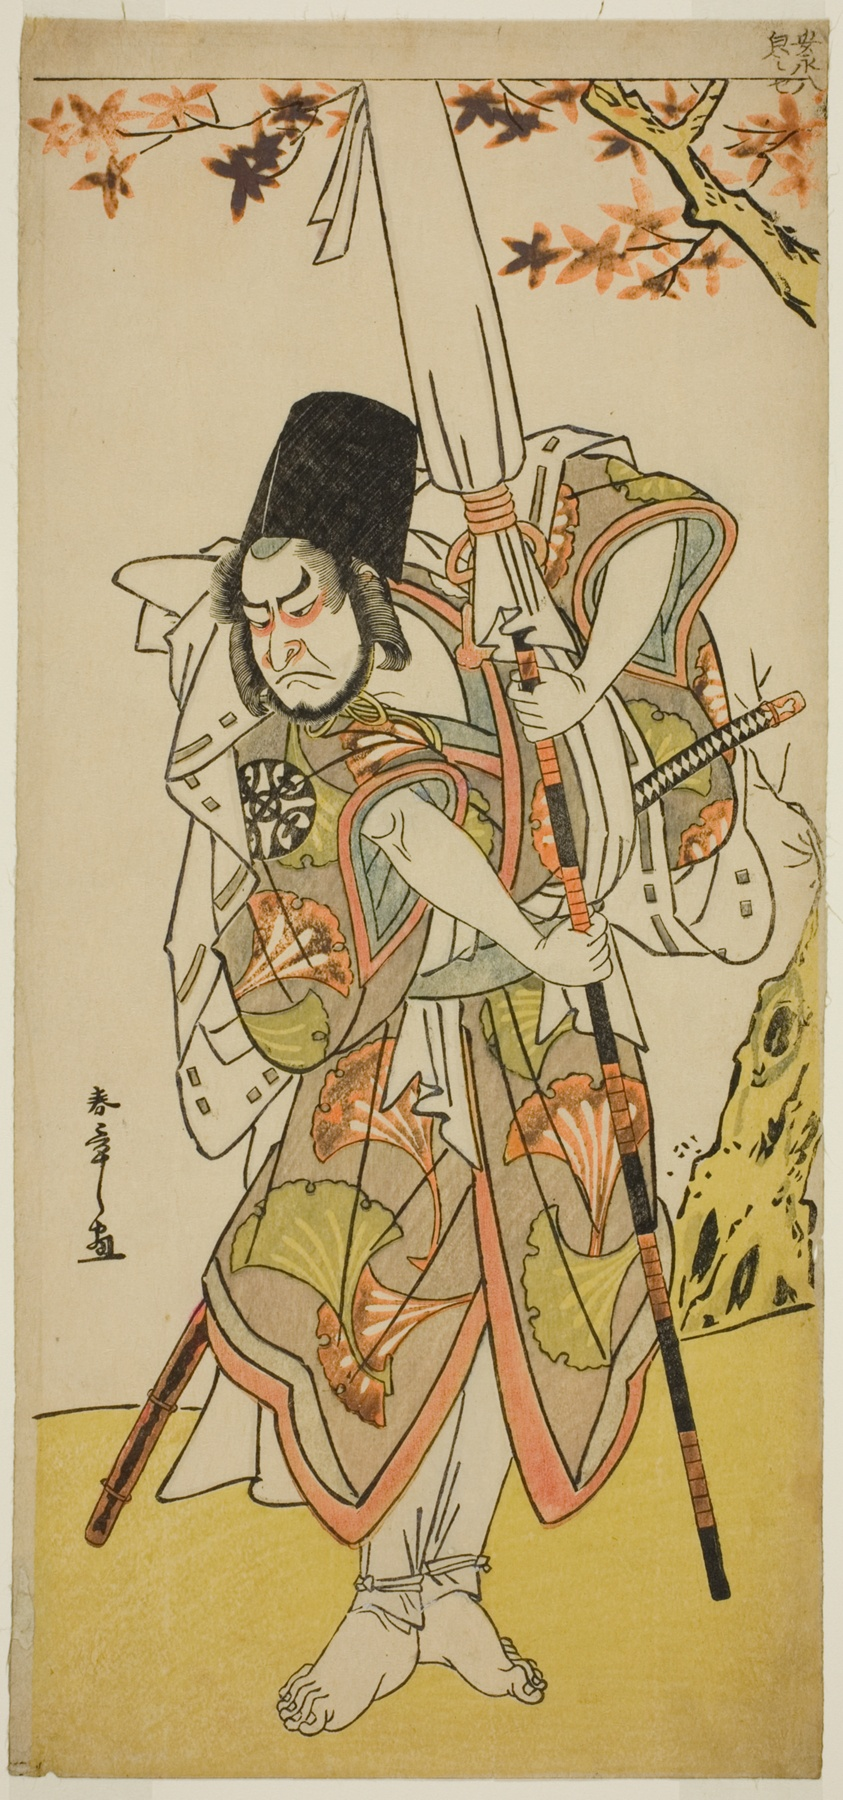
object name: Print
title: The Actor Nakamura Nakazo I as Katsuhei, Servant of a Princely Family, in the Play Uta Kurabe Tosei Moyo, Performed at the Morita Theater in the Eleventh Month, 1779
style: Japanese (culture or style)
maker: Katsukawa Shunsho 勝川 春章; Japanese, 1726-1792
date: c. 1779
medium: Color woodblock print; hosoban; from a multisheet composition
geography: Japan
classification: woodblock print; print; asian art